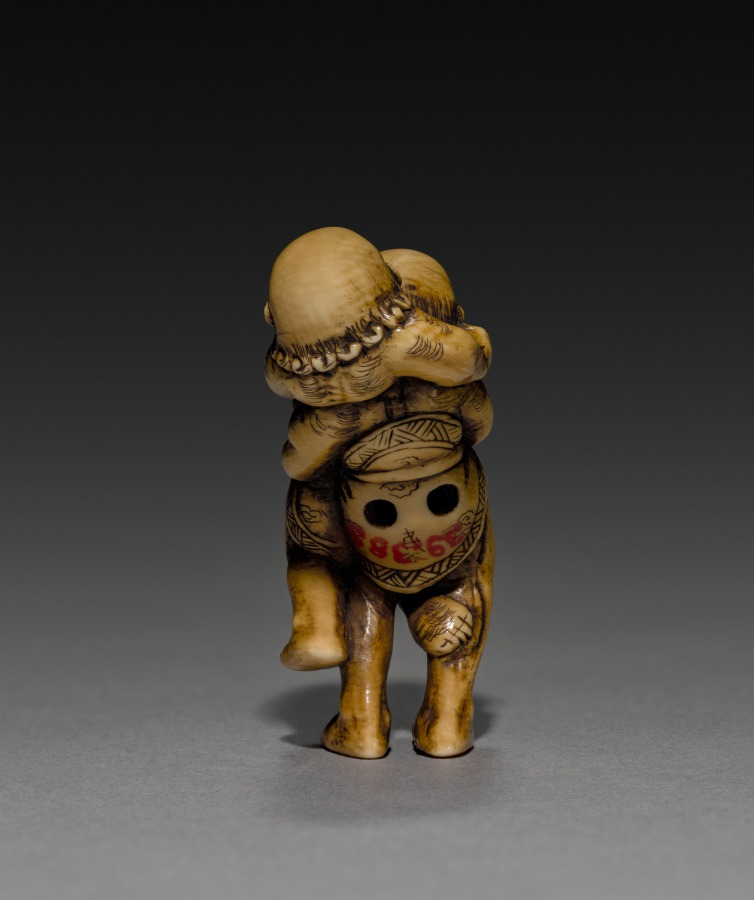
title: Man Carrying Another Man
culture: Japan, Meiji period (1868–1912)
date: early 1900s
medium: ivory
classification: Netsuke